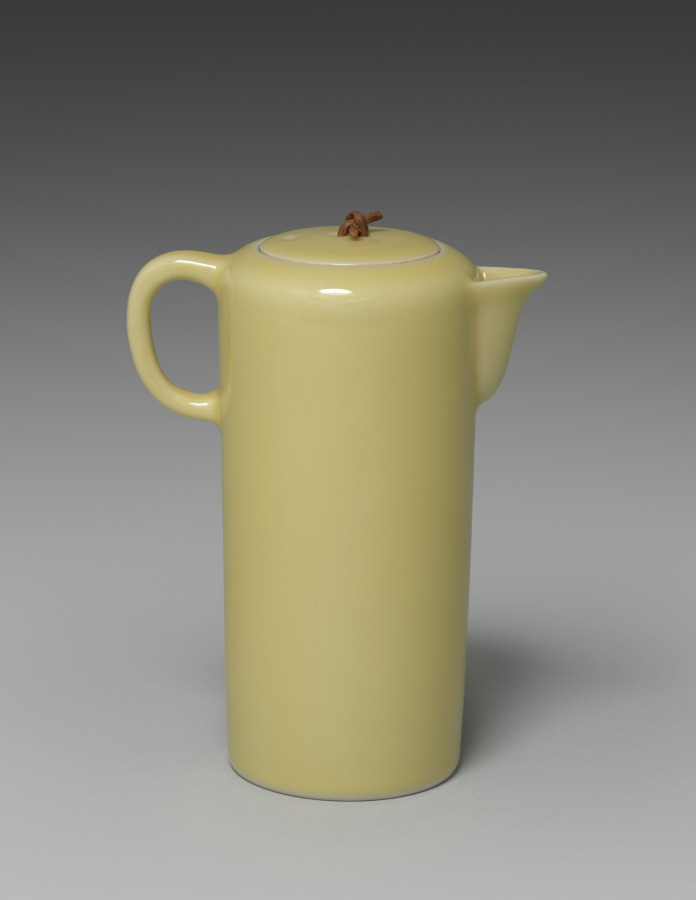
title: Sake Pourer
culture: Japan, Taishō period (1912–26) or Shōwa period (1926–89)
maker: Seifū Yohei IV (Japanese, 1872–1951)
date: 1914–46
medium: One of a pair of sake pourers; porcelain with yellow glaze and bamboo lid handles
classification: Ceramic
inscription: 清風造 。 【印】 清風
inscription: 成山清風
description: Like his father, Yohei IV also produced works with red or yellow monochrome glazes. His yellow-glazed works include this pair of sake pourers, a set of five drinking cups CMA 2022.217, and a sweets bowl molded into the shape of a chrysanthemum CMA 2022.218.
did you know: The lid's handle is made of bamboo.